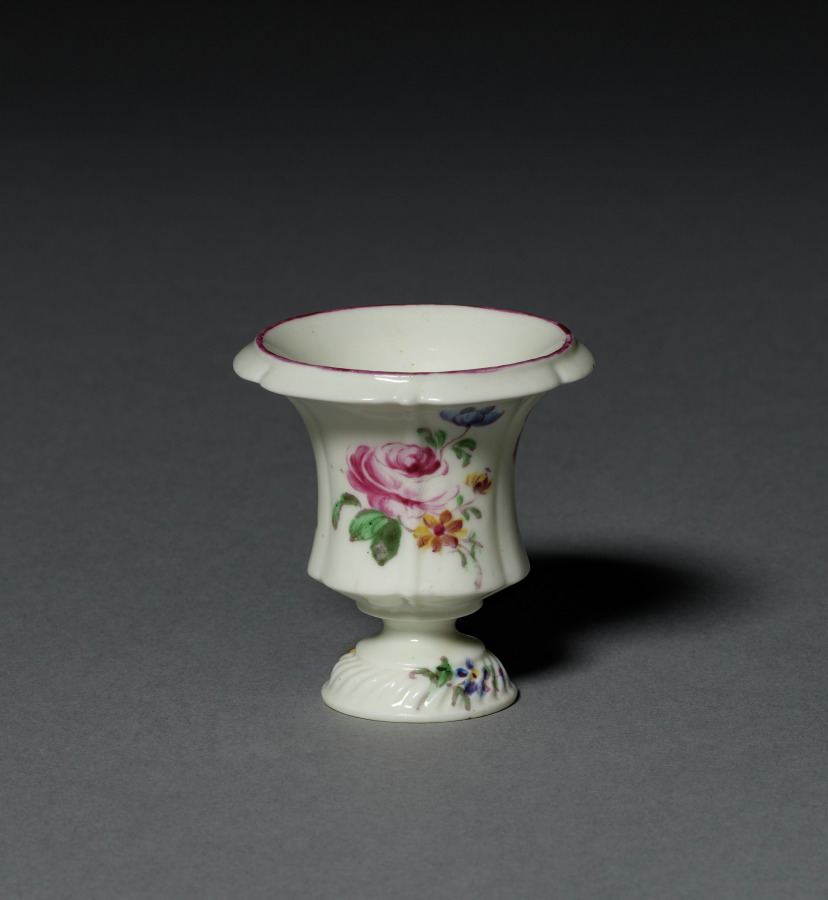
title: Small Urn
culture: France, Mennecy, 18th century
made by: Mennecy Factory (French)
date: c. 1750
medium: soft-paste porcelain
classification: Ceramic